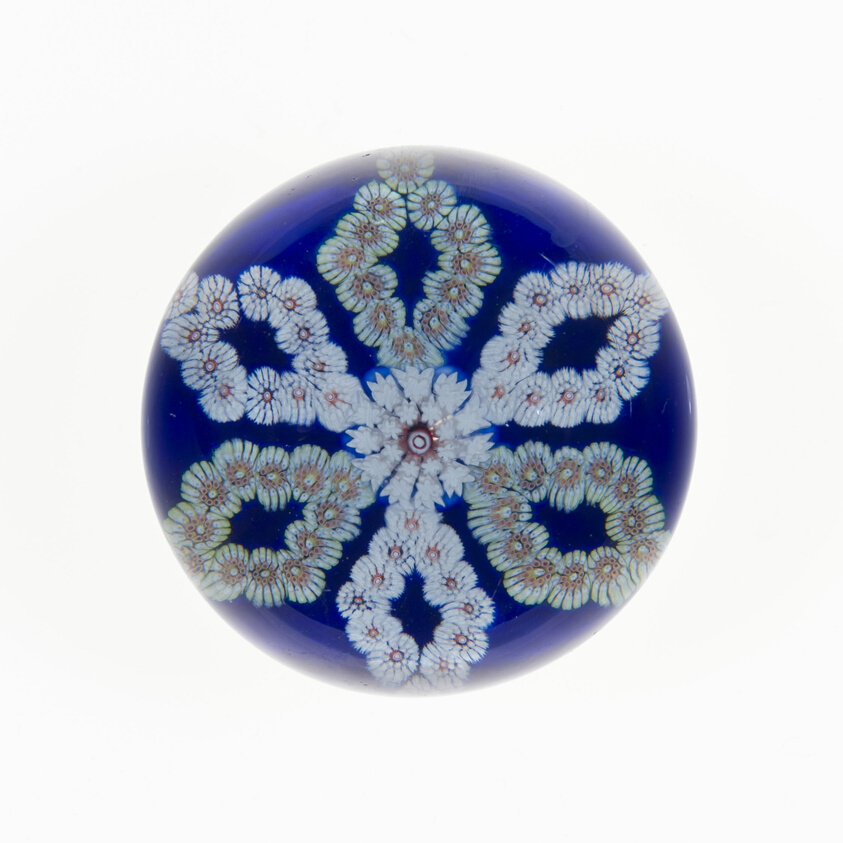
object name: Glass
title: Paperweight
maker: Clichy Glassworks (Cristalleries de Clichy); Clichy, France, 1837-1885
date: c. 1845/60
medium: Glass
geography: France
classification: paperweight; glass